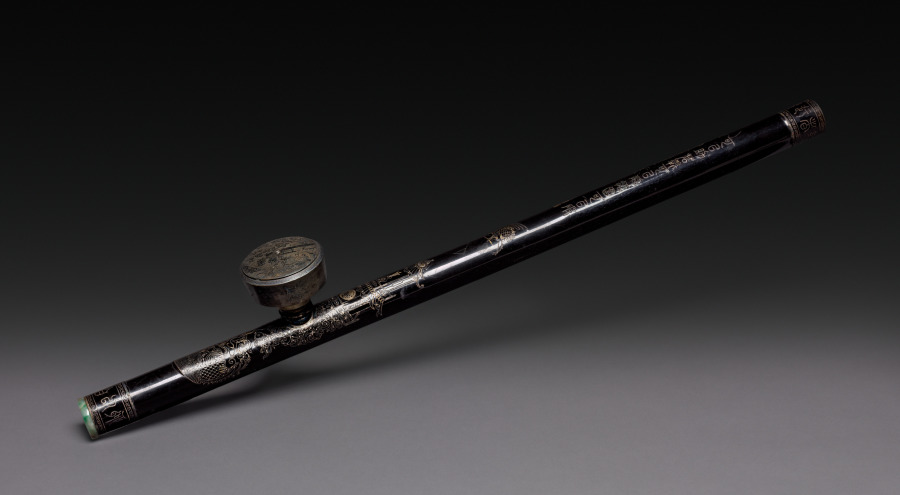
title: Opium Pipe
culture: China, Qing dynasty (1644-1911)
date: 1800s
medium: lacquer with silver and gold inlay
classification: Miscellaneous